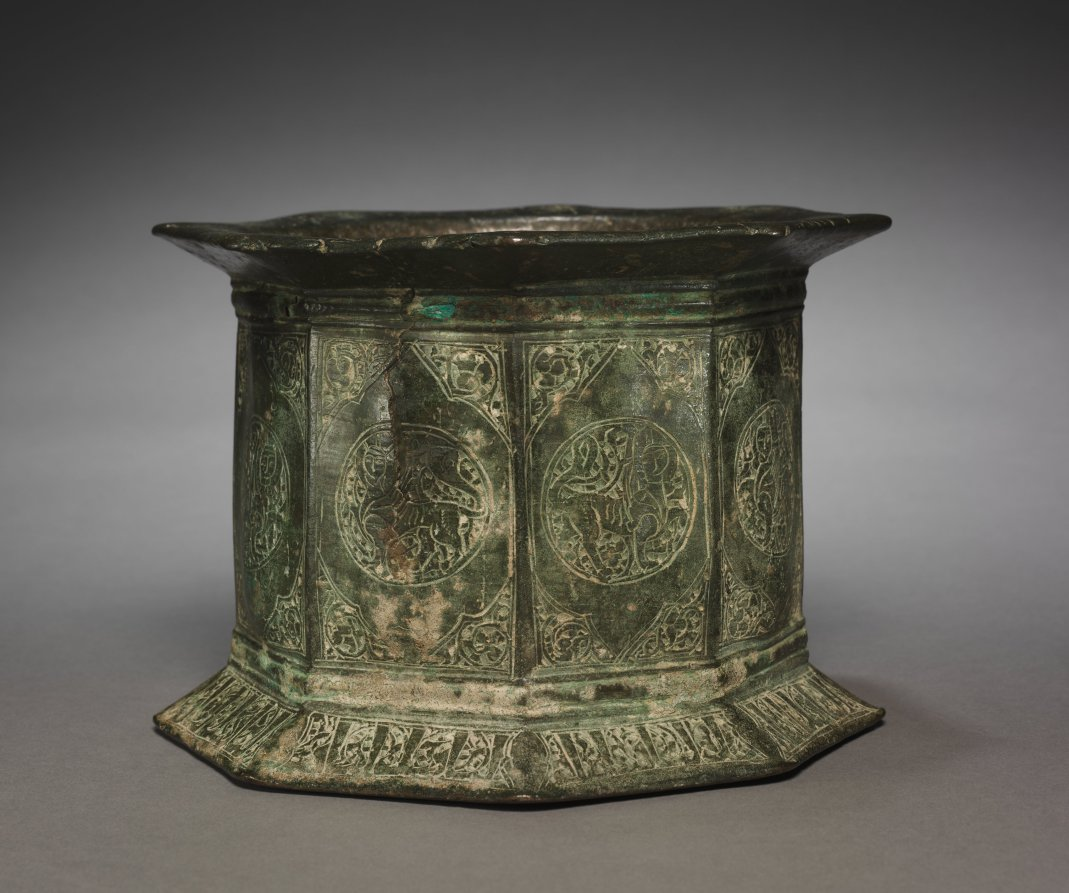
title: Mortar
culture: Iran, Seljuq period (1037–1194)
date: 1100s–1200s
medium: Cast bronze with incised decoration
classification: Metalwork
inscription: Thulth inscription on the Base, undeciphered